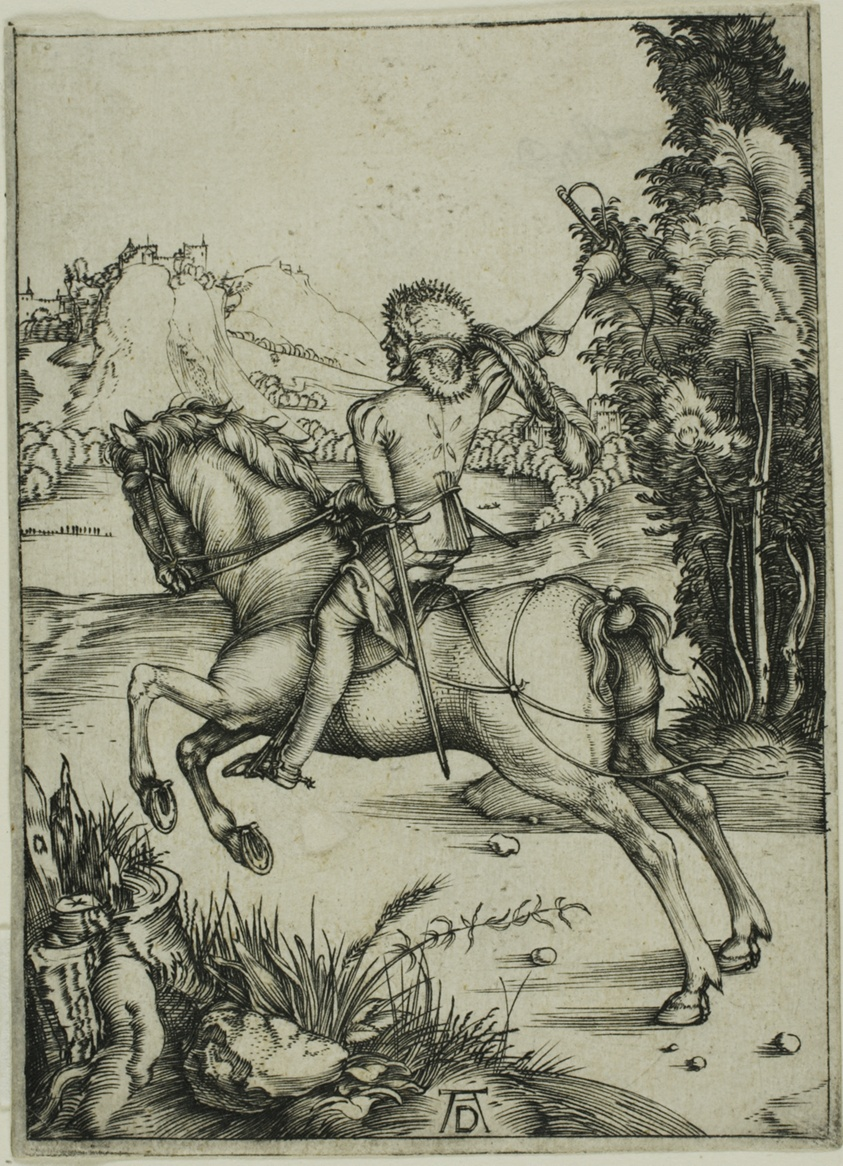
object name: Print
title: The Small Courier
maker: Albrecht Dürer (German, 1471-1528)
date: c. 1496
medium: Engraving in black on ivory laid paper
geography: Germany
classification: engraving; print; prints and drawing; paper